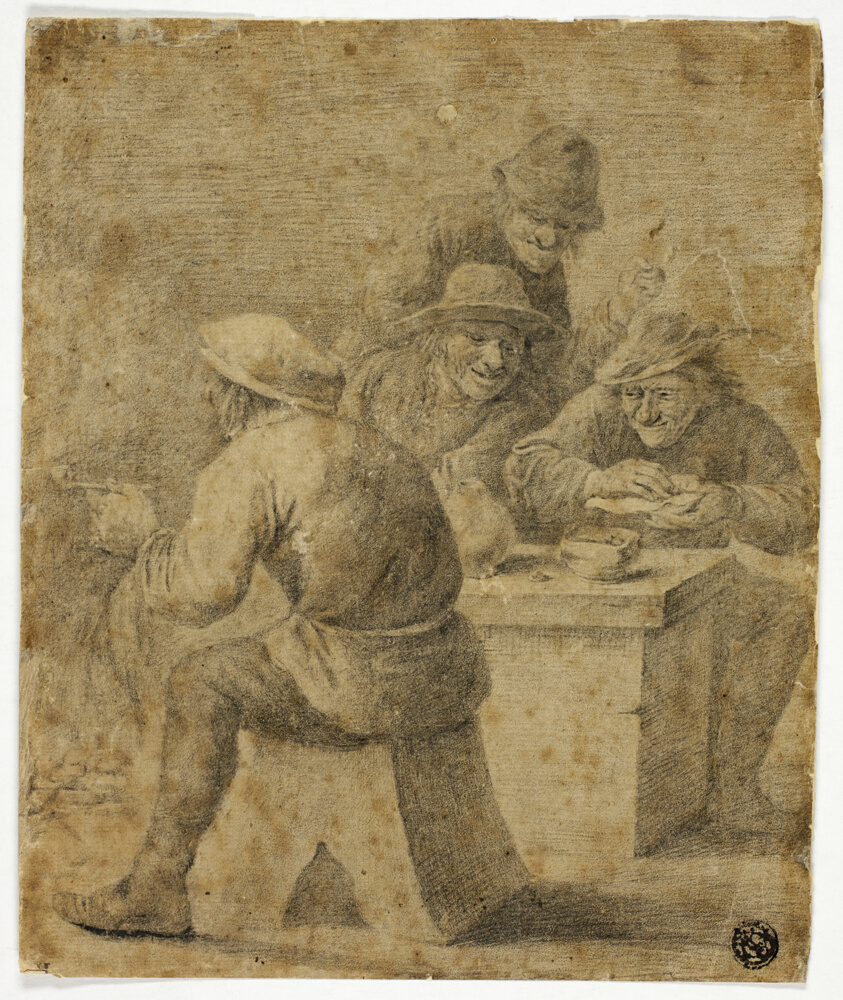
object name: Drawing and Watercolor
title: Four Peasants at Table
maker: After Adriaen Brouwer (Flemish, 1605/06-1638); or possibly Frans Hals (Dutch, 1582/83-1666) or his school; or Dirck Hals (Dutch, 1591-1656)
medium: Black chalk on tan laid paper, laid down on tan laid paper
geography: Flanders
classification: graphite; drawings (visual works); prints and drawing